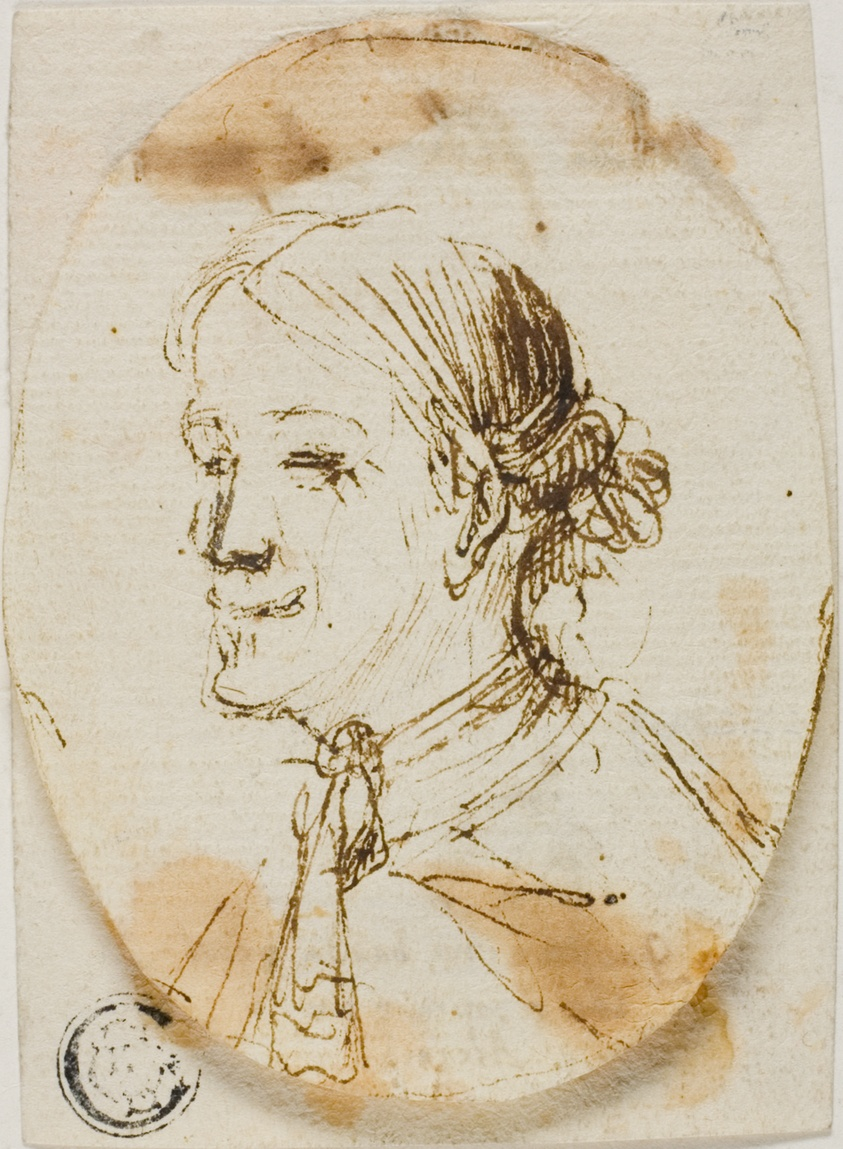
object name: Drawing and Watercolor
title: Portrait Bust of Man Wearing Cravat (recto); Sketch of Saddle (verso)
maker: Style of Stefano della Bella; Italian, 1610-1664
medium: Pen and brown ink (recto), and red and brown ink (verso), on ivory laid paper, cut to oval, tipped onto ivory laid paper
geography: Italy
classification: drawings (visual works); prints and drawing